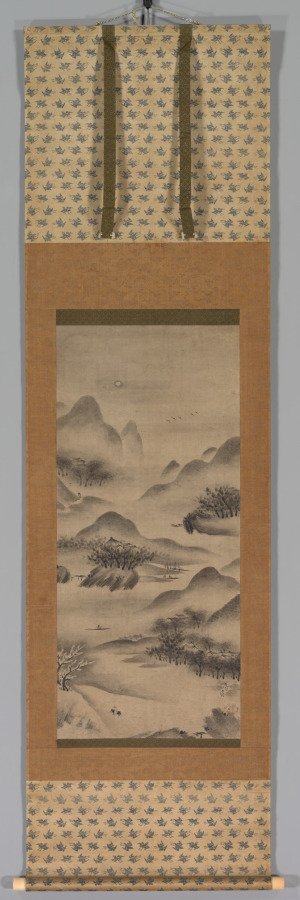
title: Landscape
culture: Japan, Edo period (1615–1868)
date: early 1600s to mid-1800s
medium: hanging scroll; ink on paper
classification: Painting